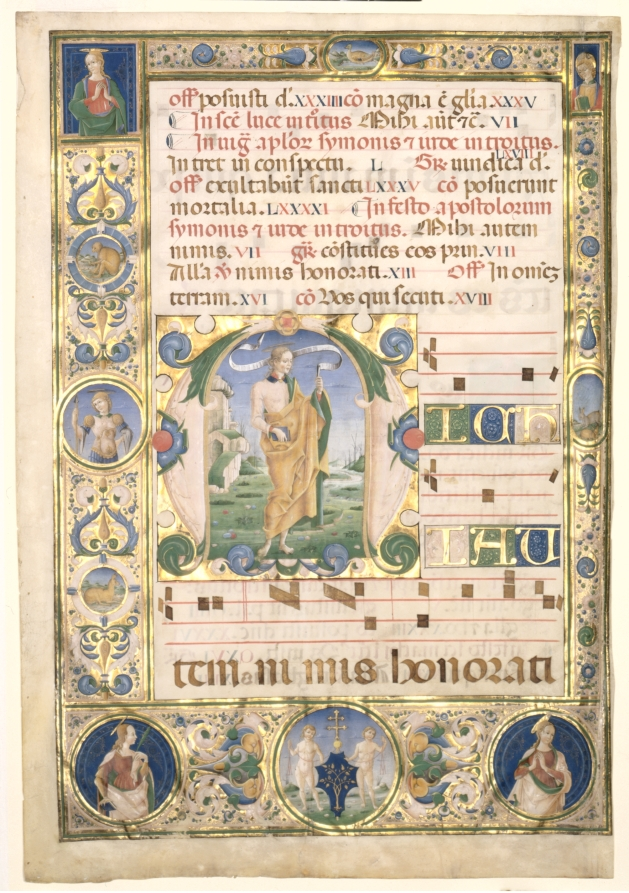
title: Leaf from a Gradual: Initial (M) with St. Andrew (recto)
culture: Italy, Ferrara, 15th century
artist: Jacopo Filippo d' Argenta (Italian, 1501)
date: c. 1480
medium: ink, tempera, and gold on parchment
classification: Manuscript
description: This leaf was excised from a volume of a large set of choral books known to have been commissioned by Bartolomeo delle Rovere for Ferrara Cathedral. Delle Rovere, nephew of Pope Sixtus IV, was the Bishop of Ferrara from 1474 to 1494 and his arms appear in the rondel at the bottom of the page-a shield bearing an oak tree (rovere in Italian) surmounted by a patriarchal cross, the symbol of his rank and authority. Payment records indicate that Argenta worked on the choir books for Ferrara Cathedral from 1478 to 1486. The initial M introduces the chant for the Introit (introduction) to the mass for the Feast of Saint Andrew, celebrated on November 30. This date also marks the beginning of the Advent season (leading to Christmas) in the liturgical calendar.